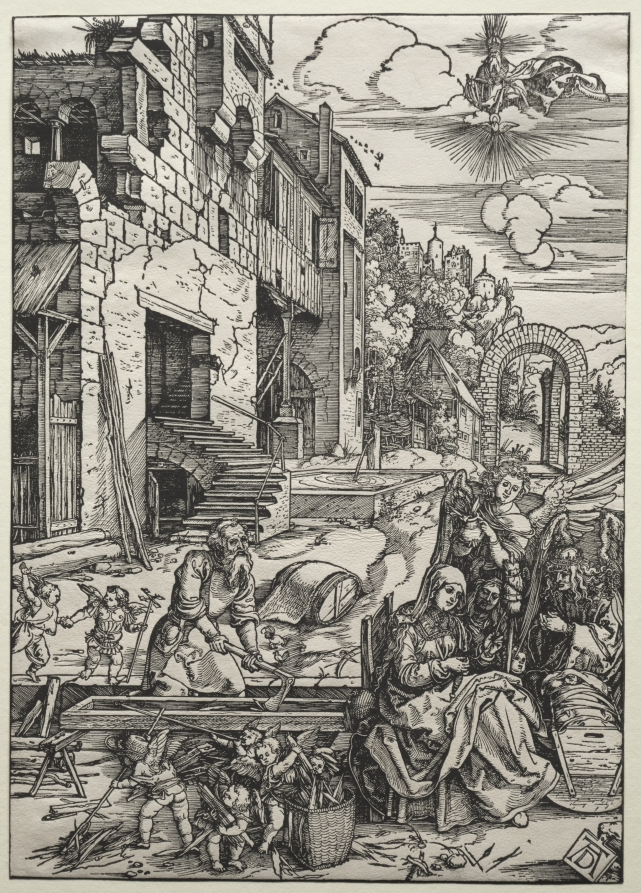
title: The Repose in Egypt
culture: Germany, early 16th Century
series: The Life of the Virgin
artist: Albrecht Dürer (German, 1471–1528)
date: c. 1501–1502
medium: woodcut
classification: Print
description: These eight woodcuts (1959.99.8-15) progress from Gabriel’s announcement to Mary that she would bear the Son of God, to the events of her early motherhood and beyond. This included the joy of sharing her pregnancy with her cousin Elizabeth, Jesus’s birth, and the subsequent arrival of the magi. After Jesus’s circumcision and presentation at the temple the Holy Family fled to Egypt to avoid Herod and stayed there for several years. The seemingly out of place last scene shows a glimpse of their daily life in Egypt as Joseph continues his carpentry and Mary spins wool. The Holy Family is surrounded by angels and helpful putti and are blessed by God the Father and the Holy Spirit in the form of a dove overhead.